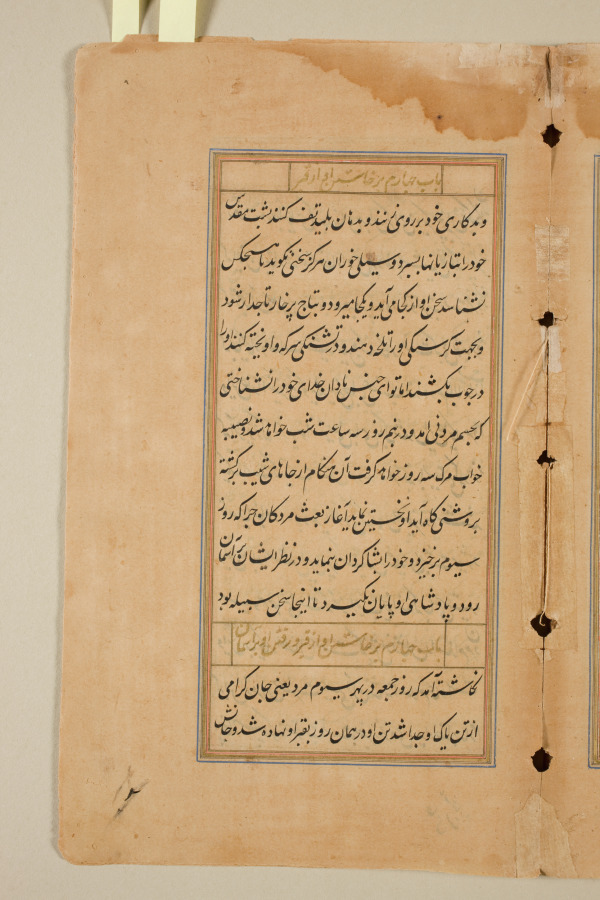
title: Text page from a Mirror of Holiness (Mir’at al-quds) of Father Jerome Xavier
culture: Mughal India, Allahabad, made for Prince Salim (1569–1627)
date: 1602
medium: Ink and gold on paper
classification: Manuscript